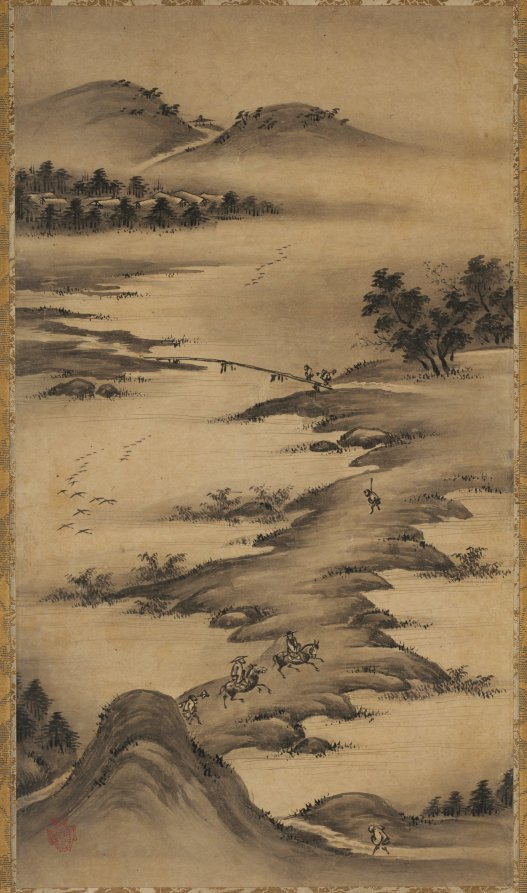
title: Seasonal Landscapes: Autumn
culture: Japan, Muromachi period (1392–1573)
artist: Kano Hideyori (Japanese, active mid- to late 1500s)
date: mid- to late 1500s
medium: hanging scroll, ink on paper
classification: Painting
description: Now comprising three scrolls, this composition was originally a set of four paintings depicting the seasons. The set is among the most important of the artist’s surviving works. Each painting was executed in the gyō mode, indicating a speedy brush with rounded strokes. The terms shin (formal), sō (cursive), and gyō (semicursive), borrowed from calligraphy terminology, are terms commonly used by connoisseurs to describe brushwork in ink paintings.